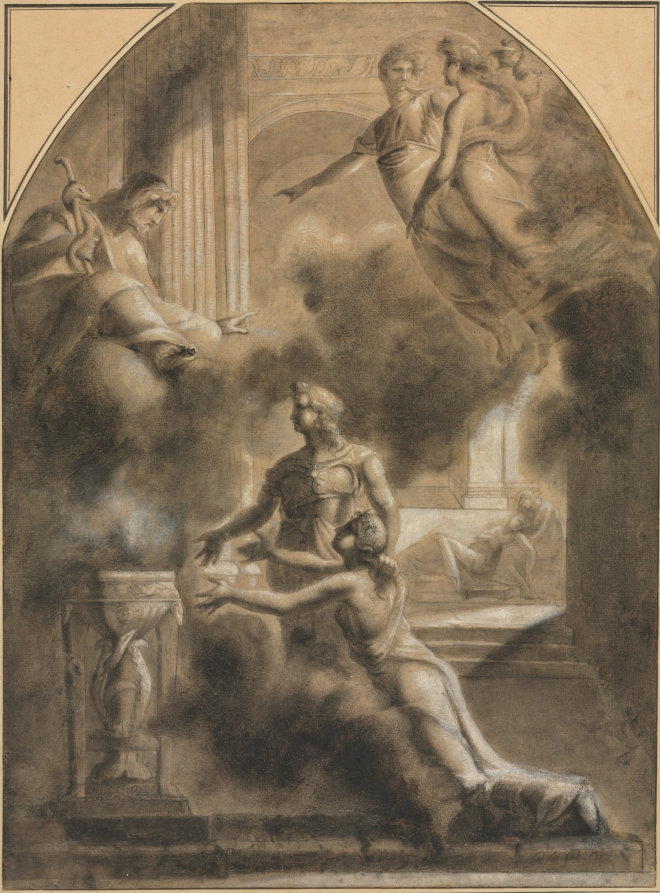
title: Mythological Scene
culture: France, 19th century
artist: Pierre-Paul Prud'hon (French, 1758–1823)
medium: black chalk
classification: Drawing